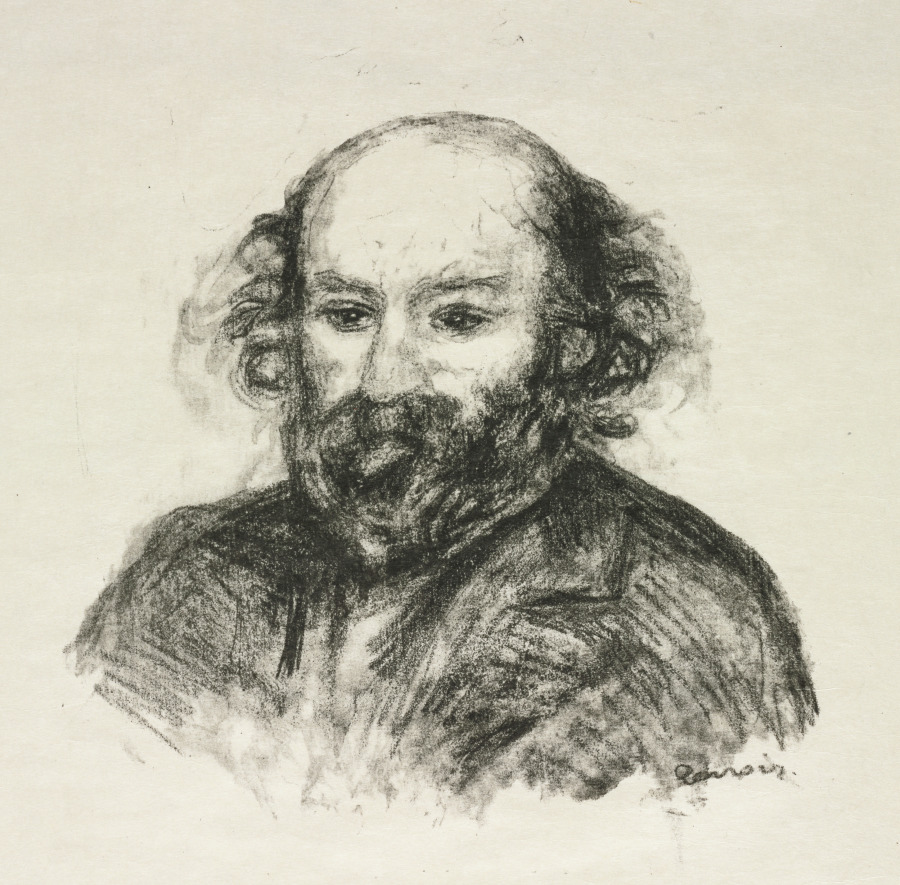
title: Paul Cézanne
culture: France, early 20th Century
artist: Pierre-Auguste Renoir (French, 1841–1919)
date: 1902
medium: lithograph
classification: Print